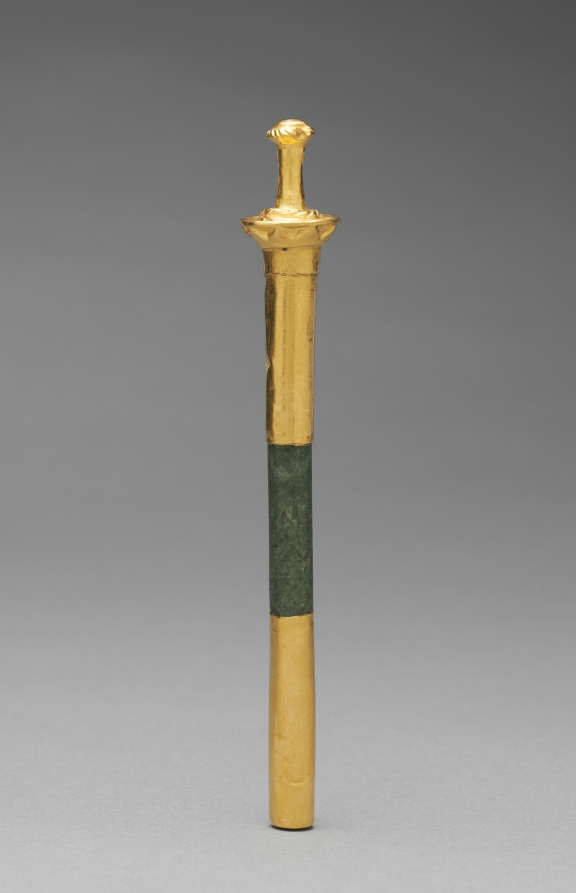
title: Ear Rod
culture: Panama, Conte style, 5th - 10th century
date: c. 700–900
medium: hammered gold, with greenstone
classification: Metalwork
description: Harvard archaeologists excavated this and seven other ornaments from several burials at Sitio Conte, a cemetery famous for its lavish graves of powerful chieftains. The young man buried in Grave 26 was such a chief. His status was stunningly memorialized by 21 human companions and 475 objects, many of them personal ornaments made of gold, including a large chest plaque and the rod-shaped ear ornament shown here.